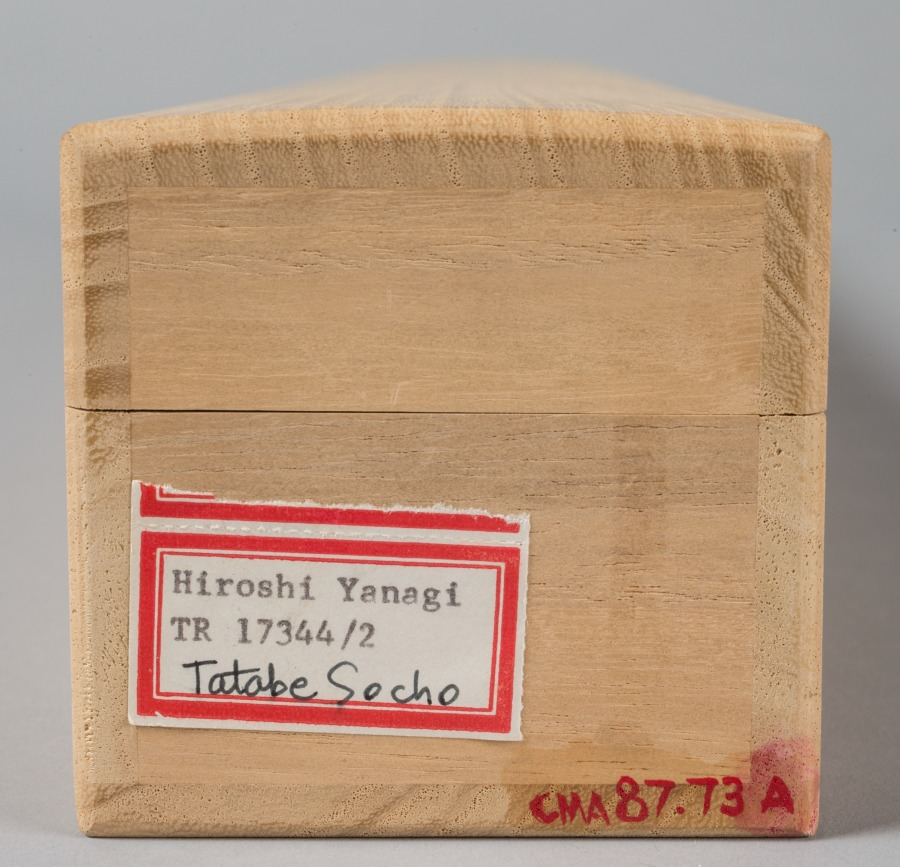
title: Genre Figures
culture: Japan, Edo period (1615–1868)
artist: Takebe Sōchō (Japanese, 1760–1814)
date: c. 1816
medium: hanging scroll; ink and color on paper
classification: Painting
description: Though rarely mentioned in official histories, Socho was an accomplished painter whose talent is readily apparent to the modern eye. For his compositions he chose traditional Japanese stories or everyday events. This painting belongs to a triptych (set of three) that was recently converted from folding screen panels to hanging scrolls.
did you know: The adult in this painting transports a small sculpted image of the fox deity Inari atop his head.